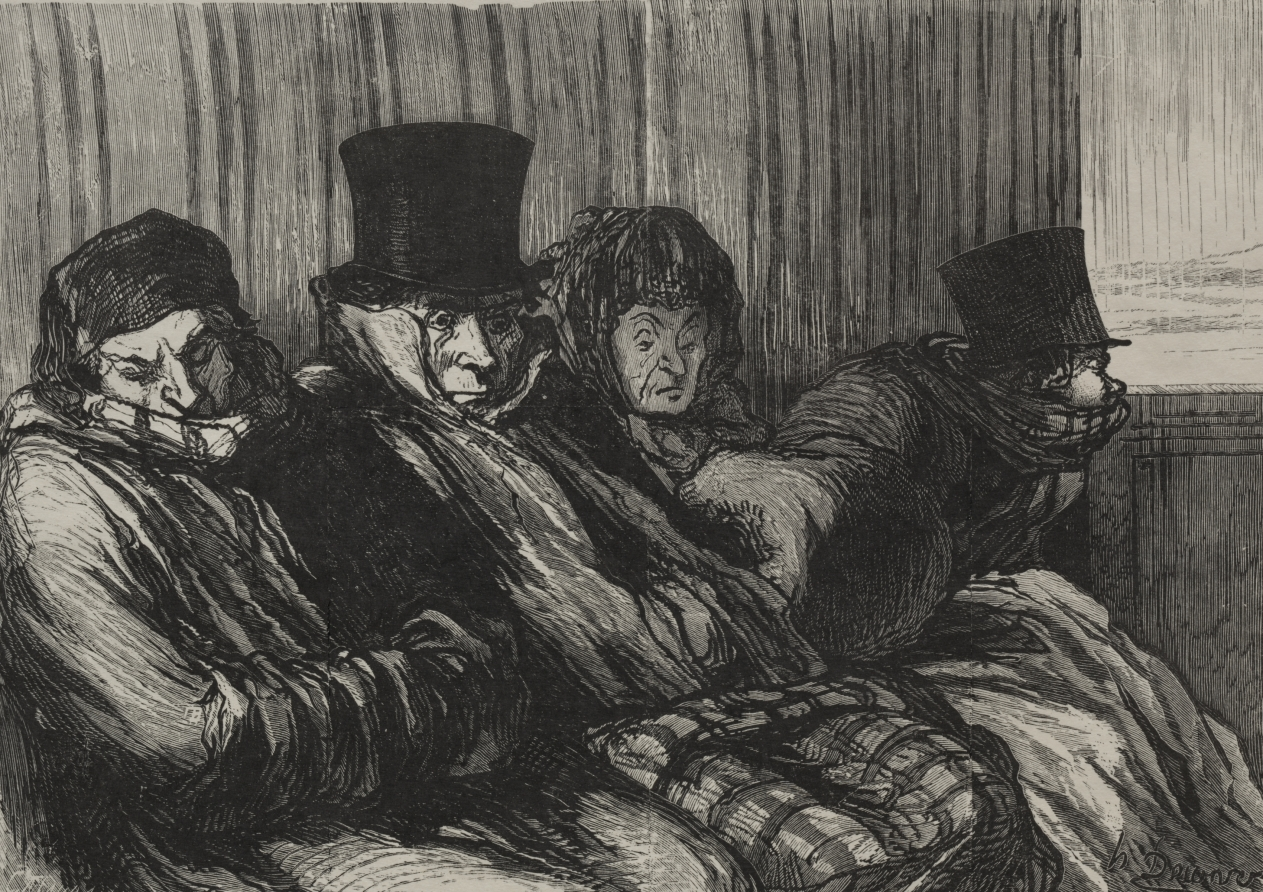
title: Holiday Train: Ten Degrees of Boredom and Bad Mood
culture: France, 19th century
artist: after Honoré Daumier (French, 1808–1879)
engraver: Charles Maurand (French, 1824–1904)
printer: François Louis Schmied (Swiss, 1873–1941)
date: 1862, printed 1920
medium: wood engraving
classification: Print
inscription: Lower margin, in pencil: 68/75 ; red stamp: FLS